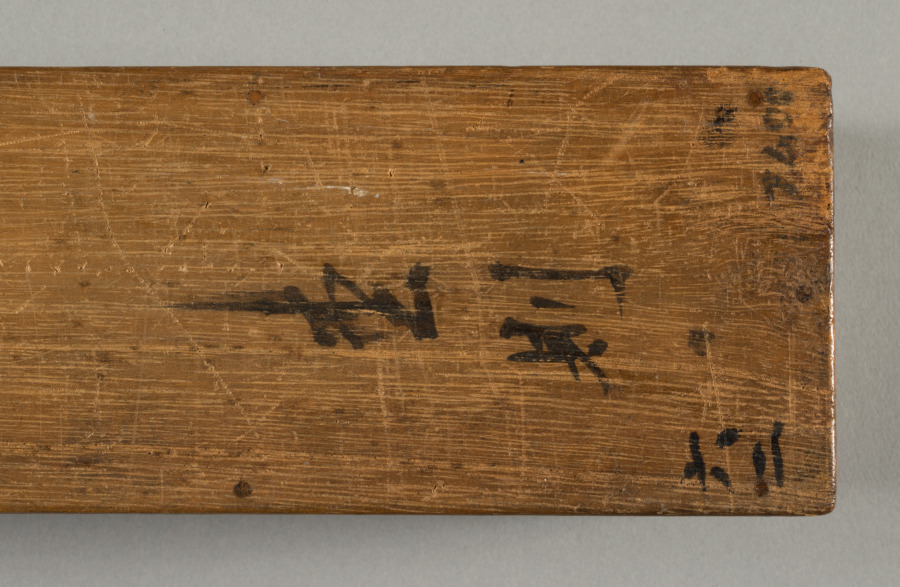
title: Ducks and Reeds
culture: Japan, Momoyama period (1573-1615) to Edo period (1615-1858)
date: early 1600s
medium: hanging scroll; ink on paper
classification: Painting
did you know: This painting was produced by a member of the Kano school.